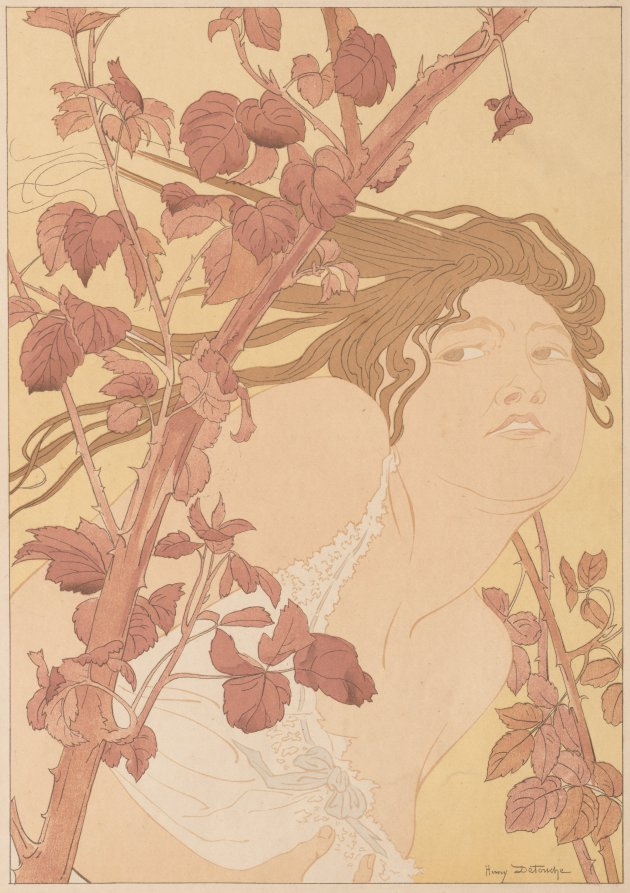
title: In the Brambles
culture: France, 19th century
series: Published in L'Estampe Moderne, no. 12, April 1898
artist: Henri Detouche (French, 1854–1913)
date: 1898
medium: color lithograph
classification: Print